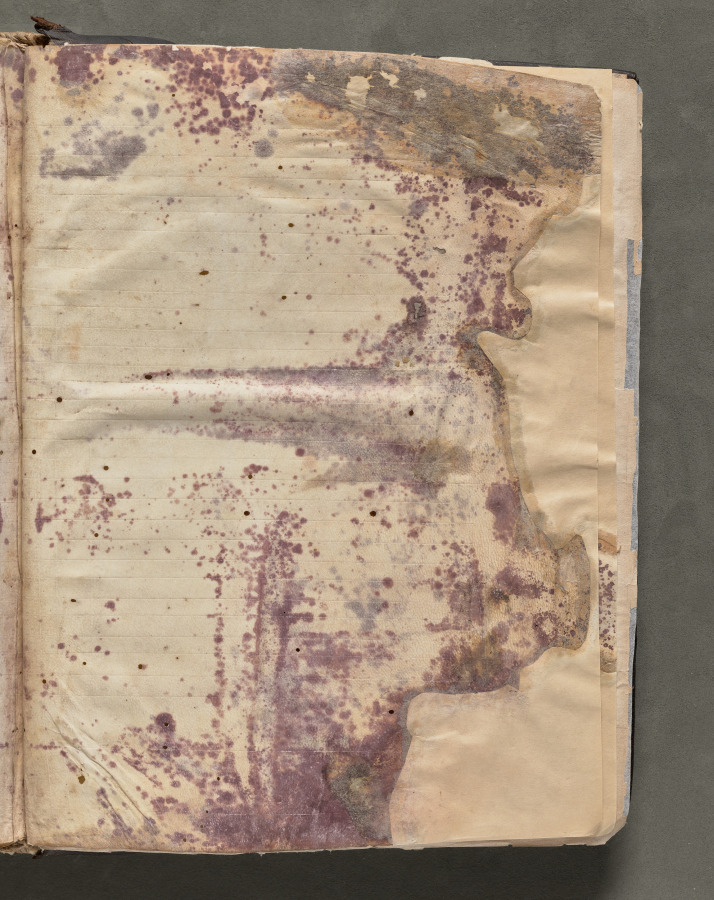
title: Text, folio 426 (recto), from a Gospel Book with Commentaries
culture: Byzantium, Constantinople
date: c. 1000–1100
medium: ink, tempera, and gold on vellum; leather binding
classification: Bound Volume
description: Each of the four gospels in this book opens on a page with brilliantly illuminated borders depicting the author of the text as well as birds—principally peacocks, symbols of the immortality of the soul—and fountains, representing the fountain of life and the salvation of the soul. This volume consists of 428 leaves with texts in Greek. Its level of sophistication suggests that it was probably written and decorated in a monastery in Constantinople.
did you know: Gospel books were carried in procession through Byzantine churches.